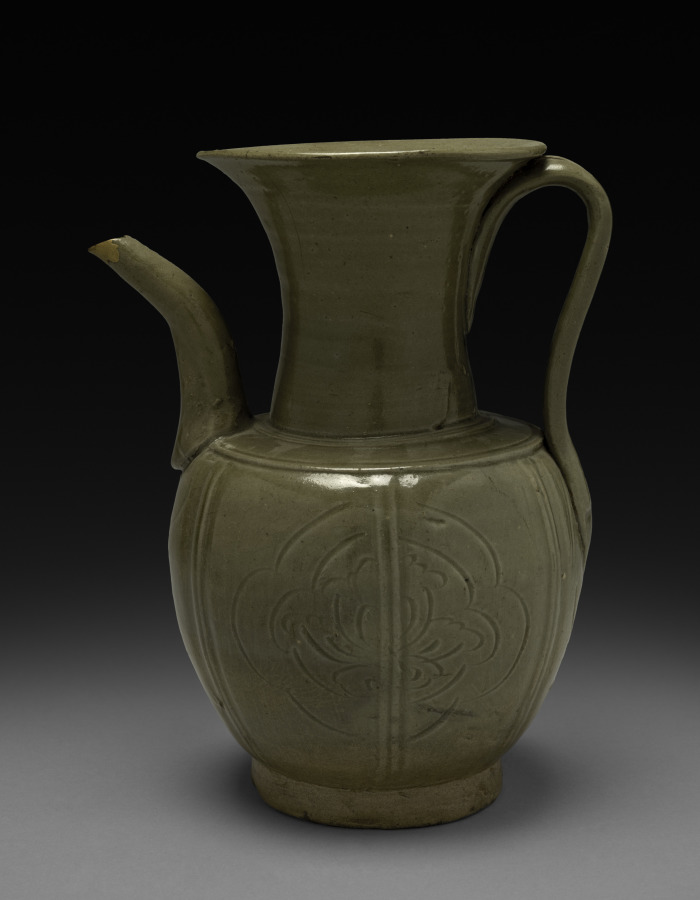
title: Wine Jug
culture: China, Zhejiang province, Shang-lin-hu type, Five dynasties (907–960) to Song dynasty (960–1279)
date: 900s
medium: glazed gray stoneware, Yue ware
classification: Ceramic